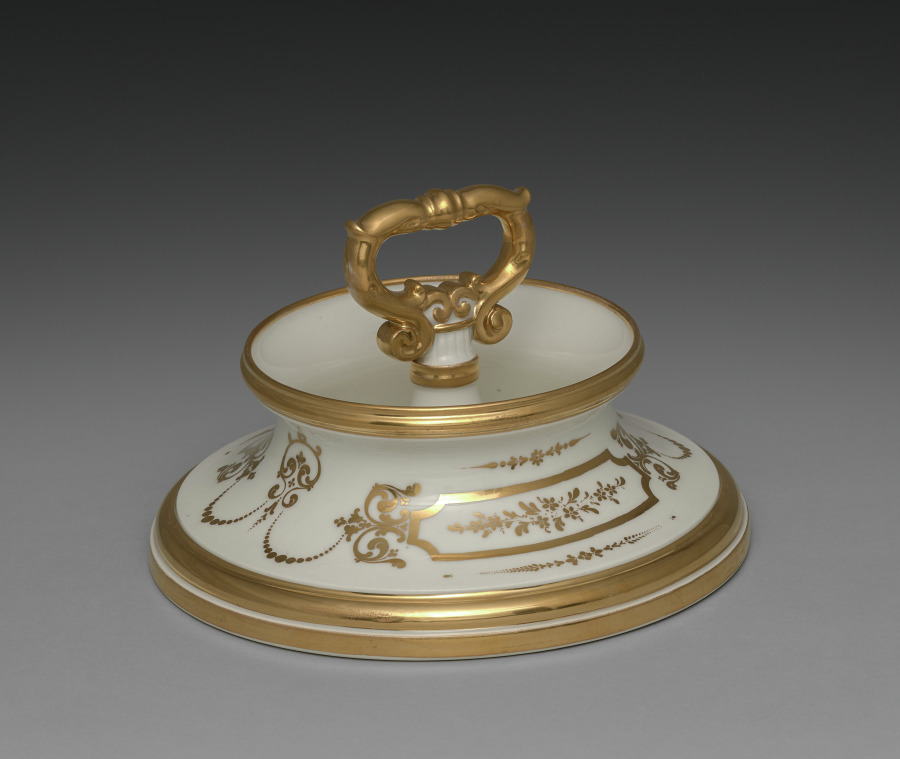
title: Lid for an Ice Cream Pail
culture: France, Paris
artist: Factory of Jacob-Petit (French, 1830–1865)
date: c. 1840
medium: gilt porcelain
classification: Ceramic